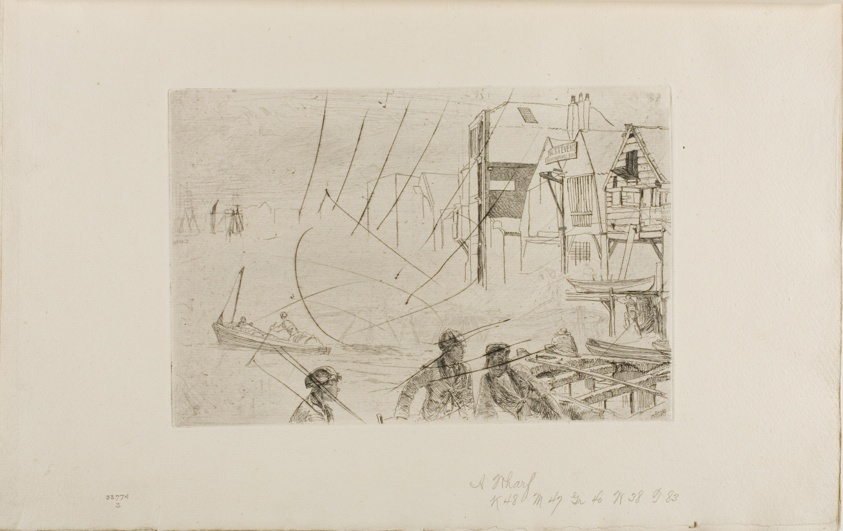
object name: Print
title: Stevens' Boat Yard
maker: James McNeill Whistler (American, 1834-1903)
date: 1859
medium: Etching and drypoint with foul biting, with drypoint cancellation, in black ink on ivory laid paper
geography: United States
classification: etching; prints and drawing; book; foul biting; drypoint; print; paper